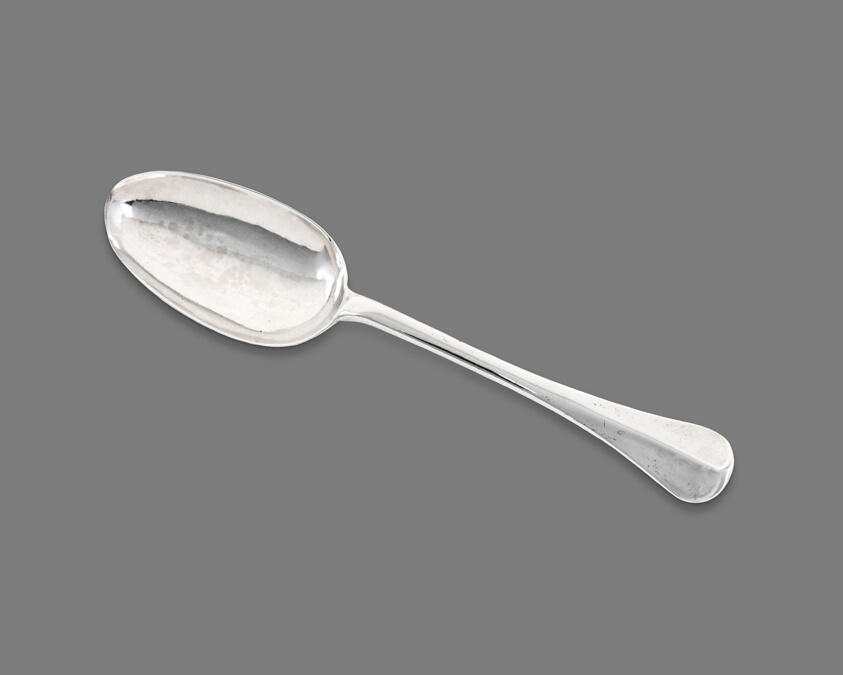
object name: Metalwork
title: Tablespoon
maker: Hezekiah Silliman; American, 1739–1804; New Haven, Connecticut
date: 1760–75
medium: Silver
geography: New Haven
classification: spoon; silver; utensil; american decorative arts; american arts; decorative arts